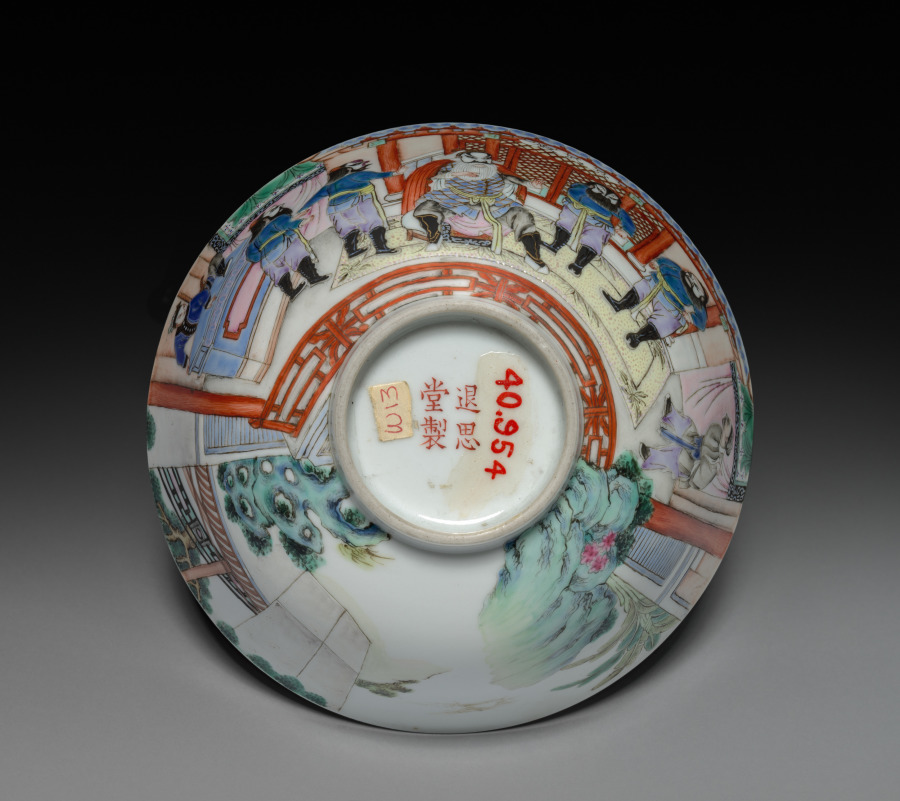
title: Five-color Bowl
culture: China, Qing dynasty (1644-1911), Daoguang reign (1821-1850)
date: 1821–1850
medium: porcelain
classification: Ceramic